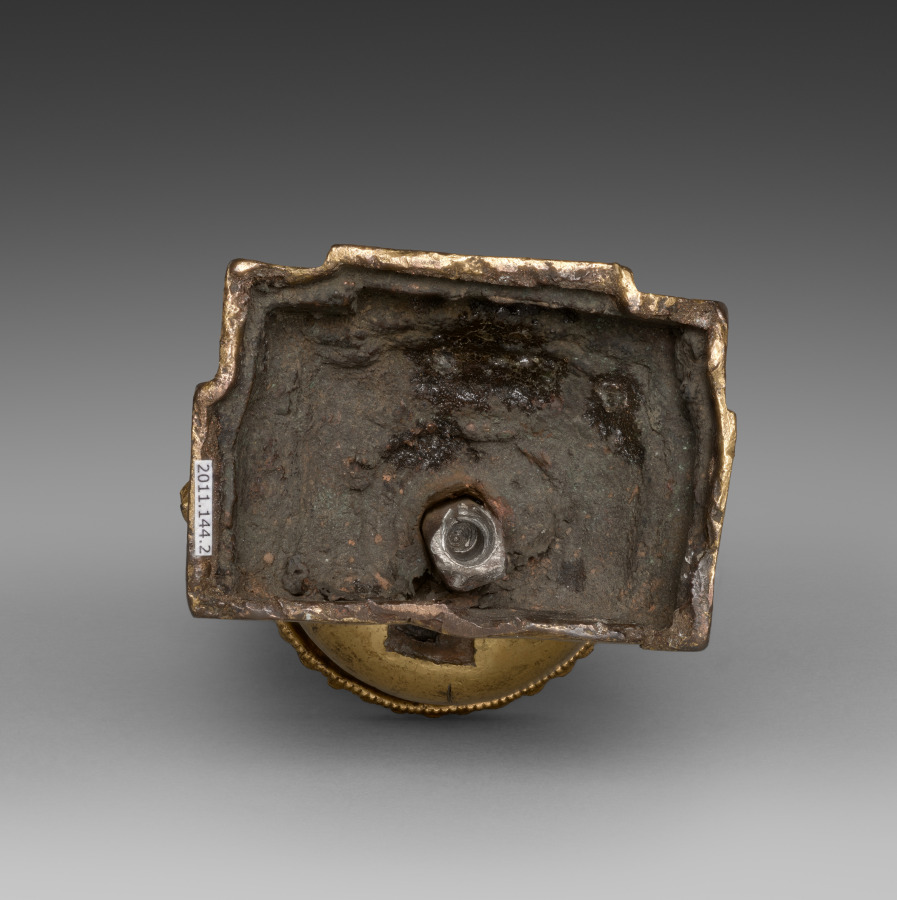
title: Support with Addorsed Figures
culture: Tibet, Densatil Monastery, 15th century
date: 1400s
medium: gilt bronze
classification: Sculpture